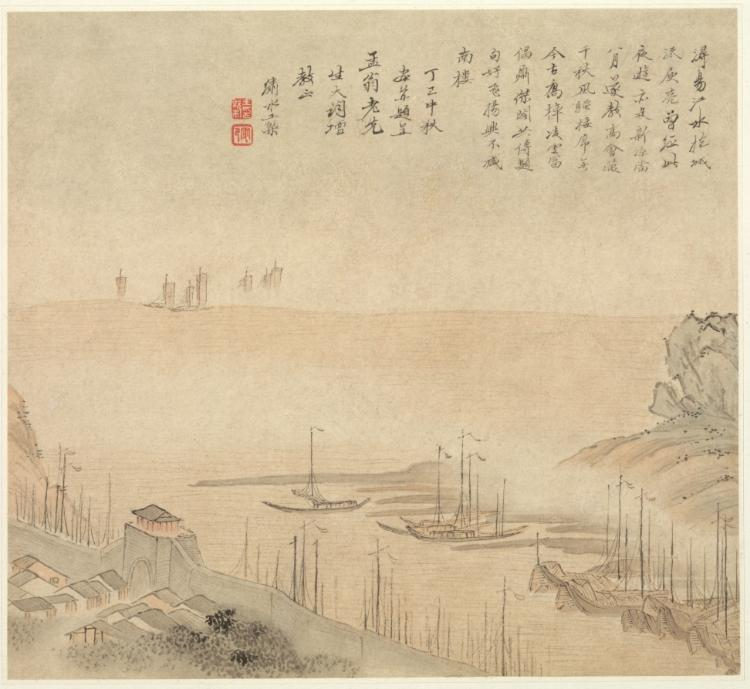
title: Album of Landscapes: Leaf 8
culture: China, Qing dynasty (1644-1911)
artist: Wang Gai (Chinese, active c. 1677–1705)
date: 1677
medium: album leaf, ink and light color on paper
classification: Painting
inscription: Artist's poem, signature, and 2 seals on leaf 8 Poem by Wang Wan